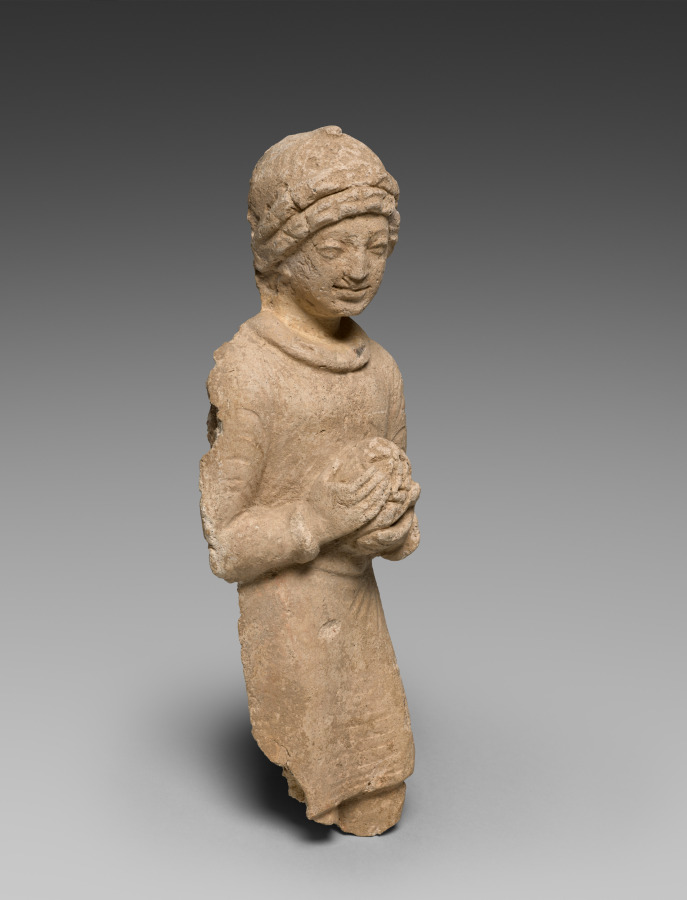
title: Layman bearing offerings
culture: Afghanistan, Hadda, probably Tape Shotor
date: c. 300 CE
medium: stucco with mother-of-pearl inlay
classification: Sculpture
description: The Buddhist monasteries at Hadda were famous internationally until their destruction by fire in the 800s CE. One thousand years later, a British explorer named Charles Masson (1800–1853) documented the site and collected many sculptures from the ruins that are now in the British Museum in London. French archaeologists carried out systematic excavations between 1926 and 1929. They brought many sculptures to the National Museum of Asian Art, Guimet, in Paris. Some sculptures entered other museum and private collections around the world. In the 1970s, Afghan archaeologists continued to document the Buddhist sites of Hadda and brought many more sculptures to the National Museum of Afghanistan in Kabul.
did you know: The Buddhist community (sangha) consists of both monks and laypeople who brought wealth to support the monasteries at Hadda.